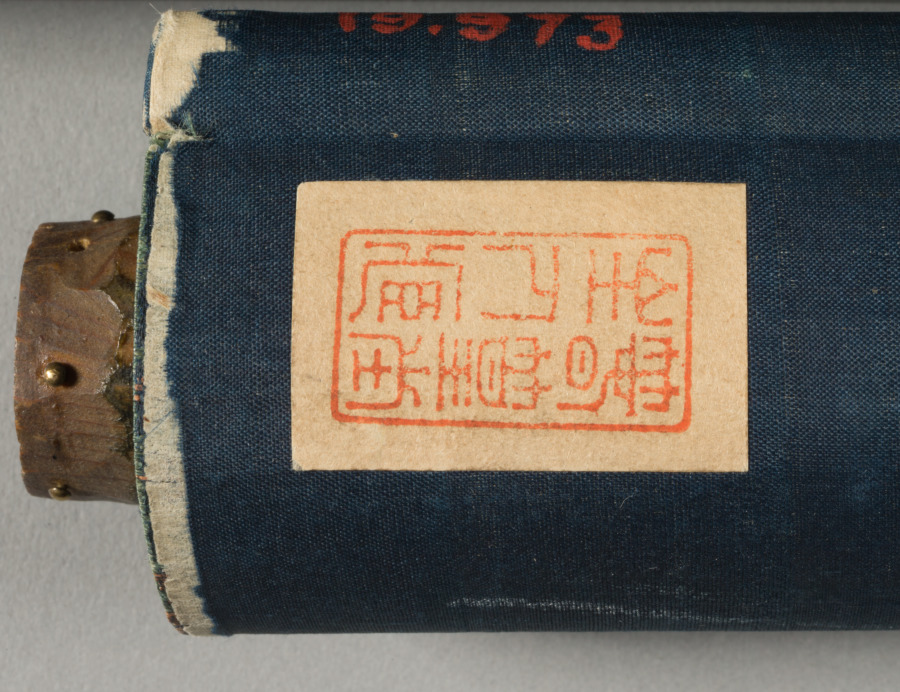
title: Monju as a Child (Chigo Monju)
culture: Japan, Muromachi period (1392–1573)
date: early 1400s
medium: hanging scroll; ink, color, and gold on silk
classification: Painting